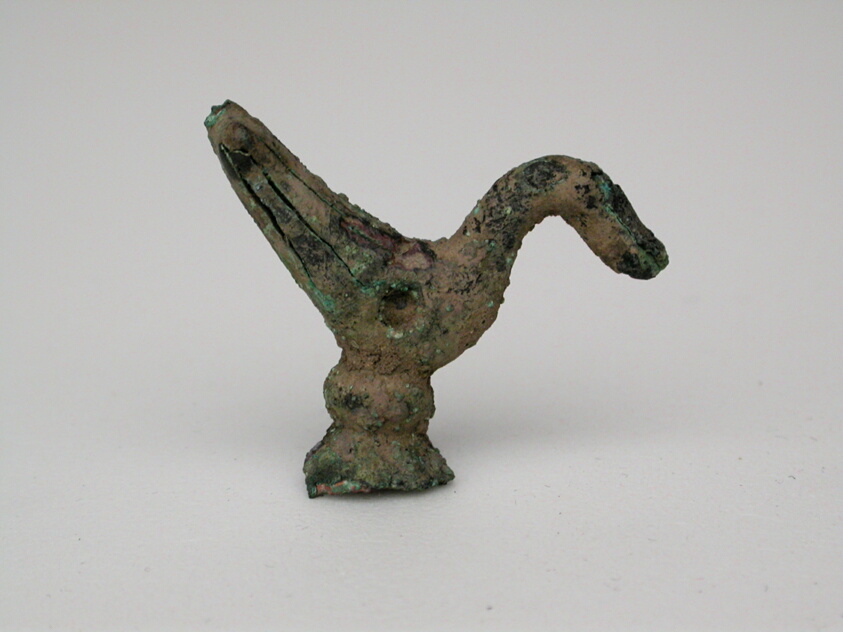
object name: Decorative Arts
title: Bird on Broken Stand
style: geometric, ancient, greek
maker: Greek; Thessaly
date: Geometric Period (early 7th century BCE)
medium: Bronze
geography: Greece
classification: votive offering; ex-voto; decorative arts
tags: bird